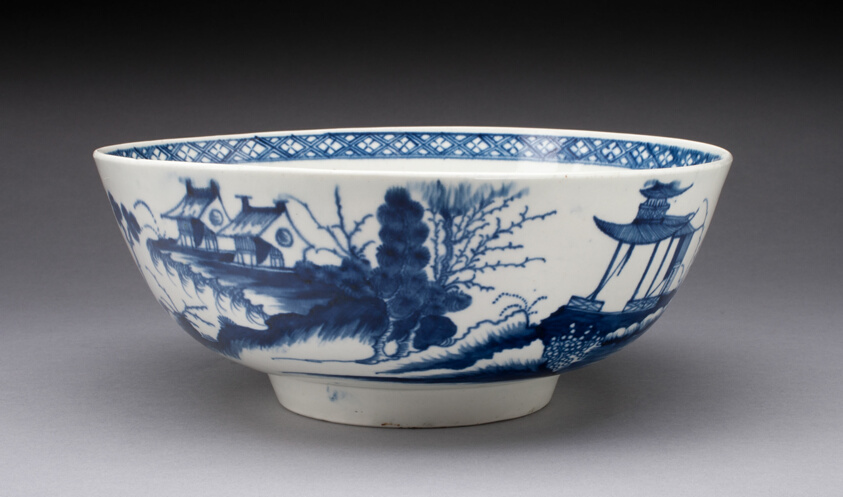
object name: Ceramics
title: Bowl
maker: Worcester Porcelain Factory (Warmstry House Period, 1751–1783); Worcester, England, founded 1751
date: c. 1770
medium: Soft-paste porcelain, underglaze blue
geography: Worcester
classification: bowl; dish (vessel); porcelain; european decorative arts; ceramics